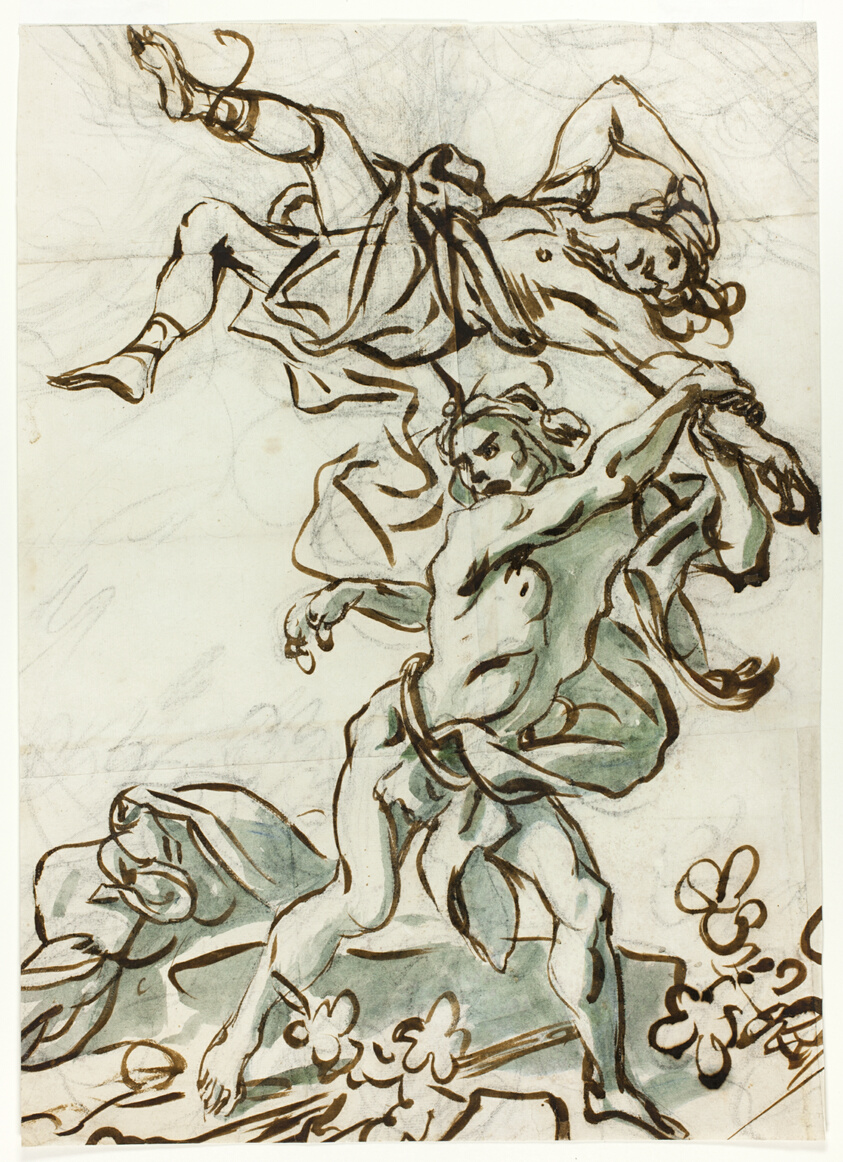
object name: Drawing and Watercolor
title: Hercules and Lichas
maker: Filippo Falciatore (Italian, active in Naples, 1718-1768)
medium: Black chalk with pen and brown ink and brush and blue-green wash on pieced ivory laid paper, pricked for transfer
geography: Italy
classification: chalk; paper; prints and drawing